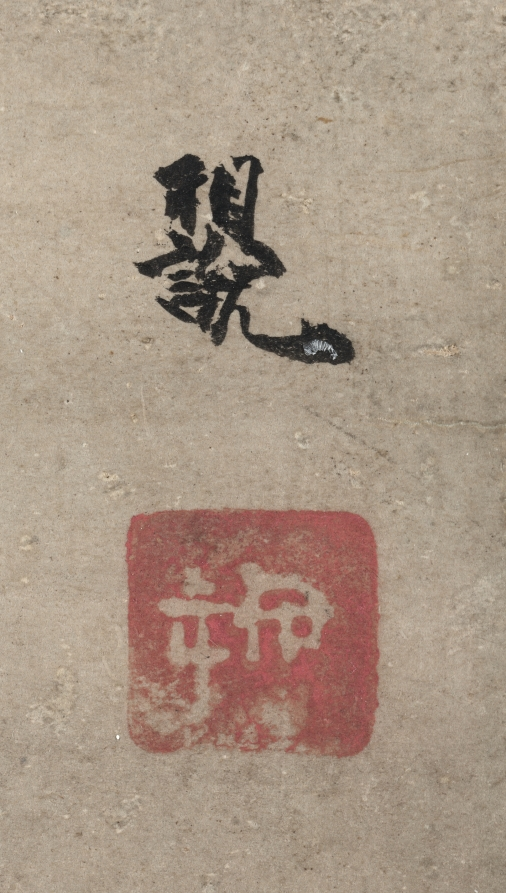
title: Chrysanthemums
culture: Japan, Edo period (1615–1868)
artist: Kitagawa Sōsetsu (Japanese, active 1639–50)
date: mid 1600s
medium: hanging scroll; ink and color on paper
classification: Painting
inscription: signature and seal: "Inen."